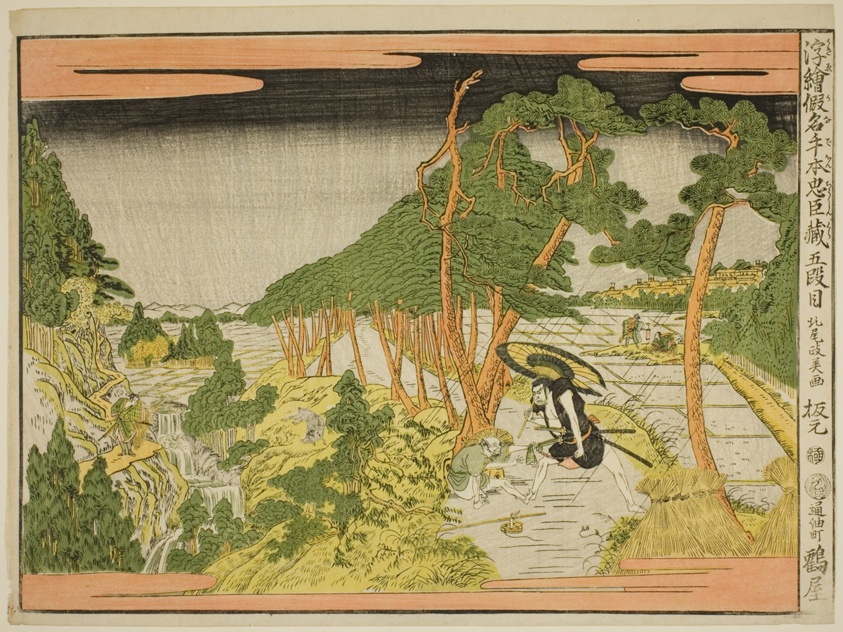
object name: Print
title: Act V (Godanme), from the series "Perspective Pictures of the Storehouse of Loyal Retainers (Uki-e kanadehon Chushingura)"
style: Japanese (culture or style), edo (japanese period)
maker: Kitao Masayoshi (Kuwagata Keisai) (Japanese, 1764–1824)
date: c. 1791/94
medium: Color woodblock print; horizontal o-oban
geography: Japan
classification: woodblock; print